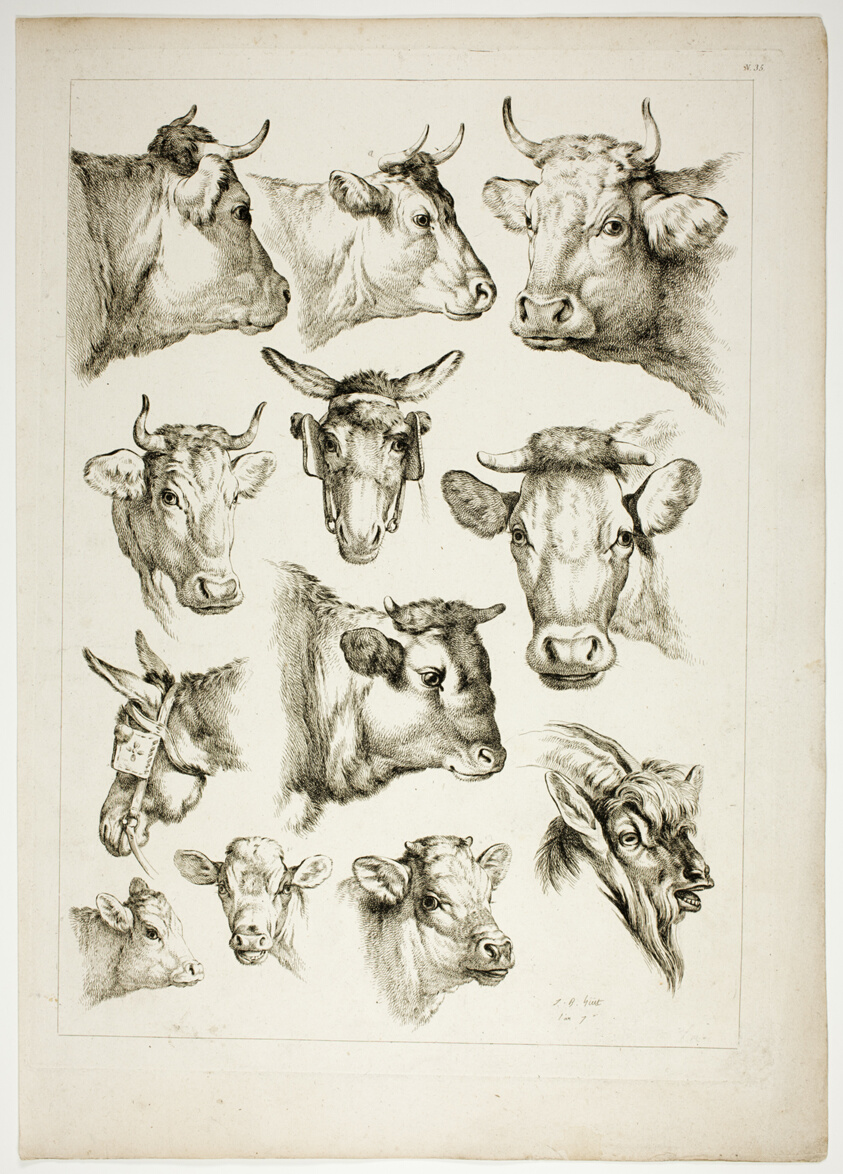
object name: Print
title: Plate 35 of 38 from Oeuvres de J. B. Huet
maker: Jean Baptiste Huet (French, 1745-1811)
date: 1796–99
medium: Etching on paper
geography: France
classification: etching; print; prints and drawing